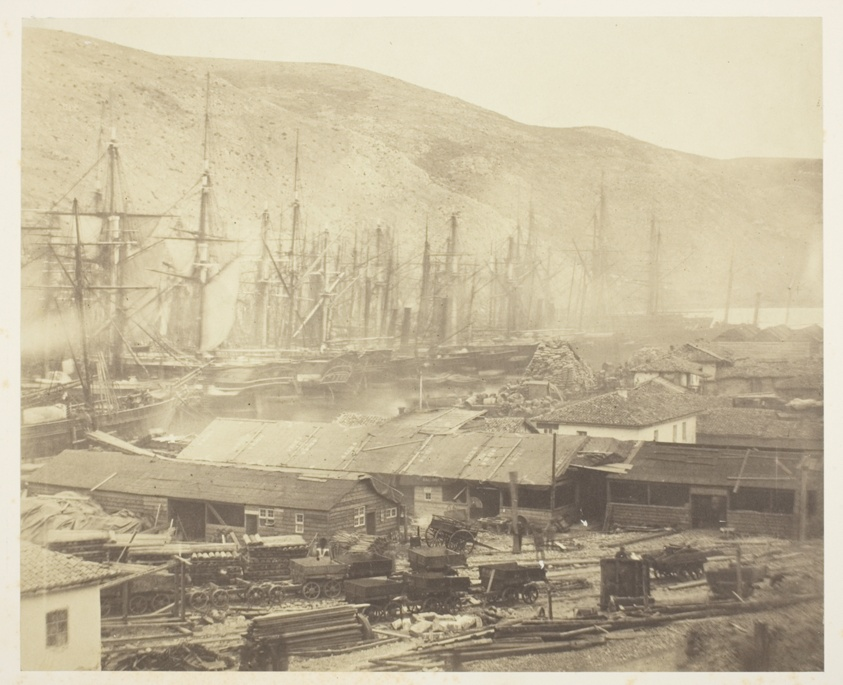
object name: Photograph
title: Railway Sheds and Workshops, Balaklava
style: 19th century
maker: Roger Fenton (English, 1819–1869)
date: 1855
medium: Salted paper print, from the album "Photographic Pictures of the Seat of War in the Crimea" (1856)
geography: England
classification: salted paper print; photographic process; photography; photograph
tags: Collected by Hugh Edwards